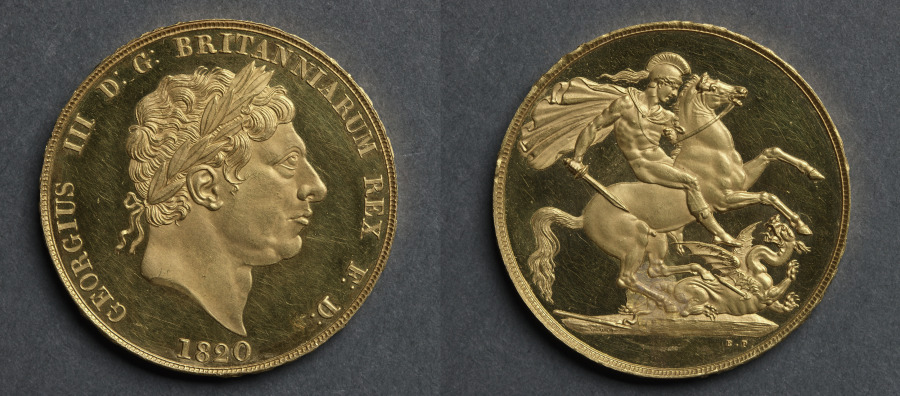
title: Two Pound Piece: George III (obverse); St. George and the Dragon (reverse)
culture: England, George III, 1760-1820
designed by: after Benedetto Pistrucci (Italian, 1784–1855)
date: 1820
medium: gold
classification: Coins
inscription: GEORGIUS III . D: G: BRITANNIARUM REX F: D: 1820.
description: The five- and two-pound pieces struck for George III were only struck as patterns in this, the last year of the his reign. No pieces of either denomination were put into circulation. This very rare piece shows Pistrucci's Saint George as modified by Wyon. In the original the lance is broken; here the lance a been converted by Wyon into a sword, and it has appeared thus in future coinage. Later, in currency issues, the streamer disappears for a time for the helmet.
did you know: Benedetto Pistrucci was an Italian gem and coin engraver, medallist, and carver of cameos.